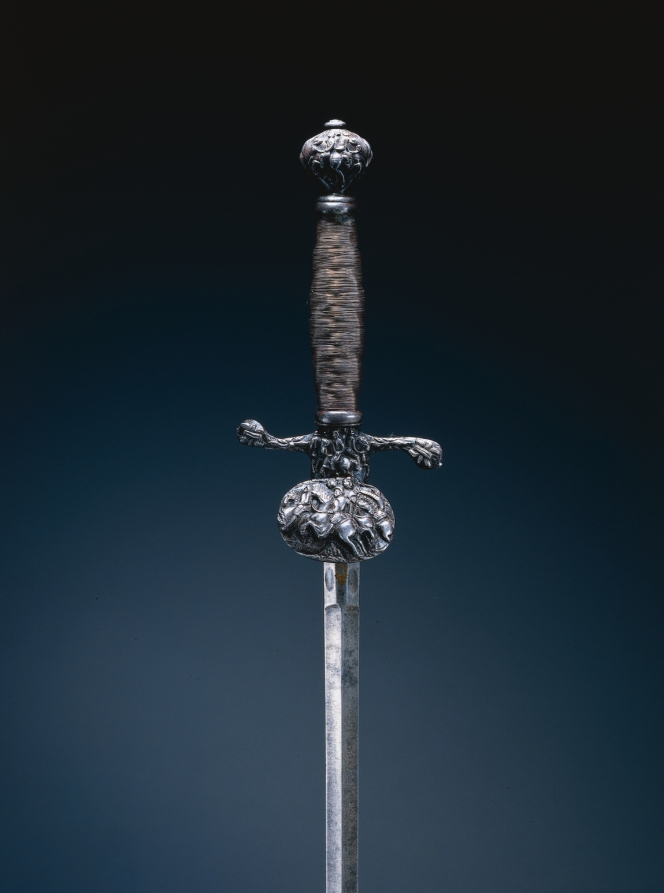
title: Small Sword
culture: France, 18th century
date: 1700s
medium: steel, copper alloy inlays; wood grip with steel wire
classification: Arms and Armor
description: The small-sword was a civilian thrusting weapon customarily worn by well-to-do gentleman in civilian dress during the weapon's heyday in the 1700s, and were later worn on formal or court occasions. They were traditionally suspended at about mid-thigh from the left side of the belt, the gilt exposed through an opening in the gentleman's coat. Since it was highly visible it was subject to lavish decoration with precious materials and fashions came and went. Many were decorated to match personal costume and were truly an emblem of social rank.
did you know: The banded pattern on the hilt was achieved by carefully winding wire over a wooden core. The result was a handle with a textured surface that improved the user's grip.